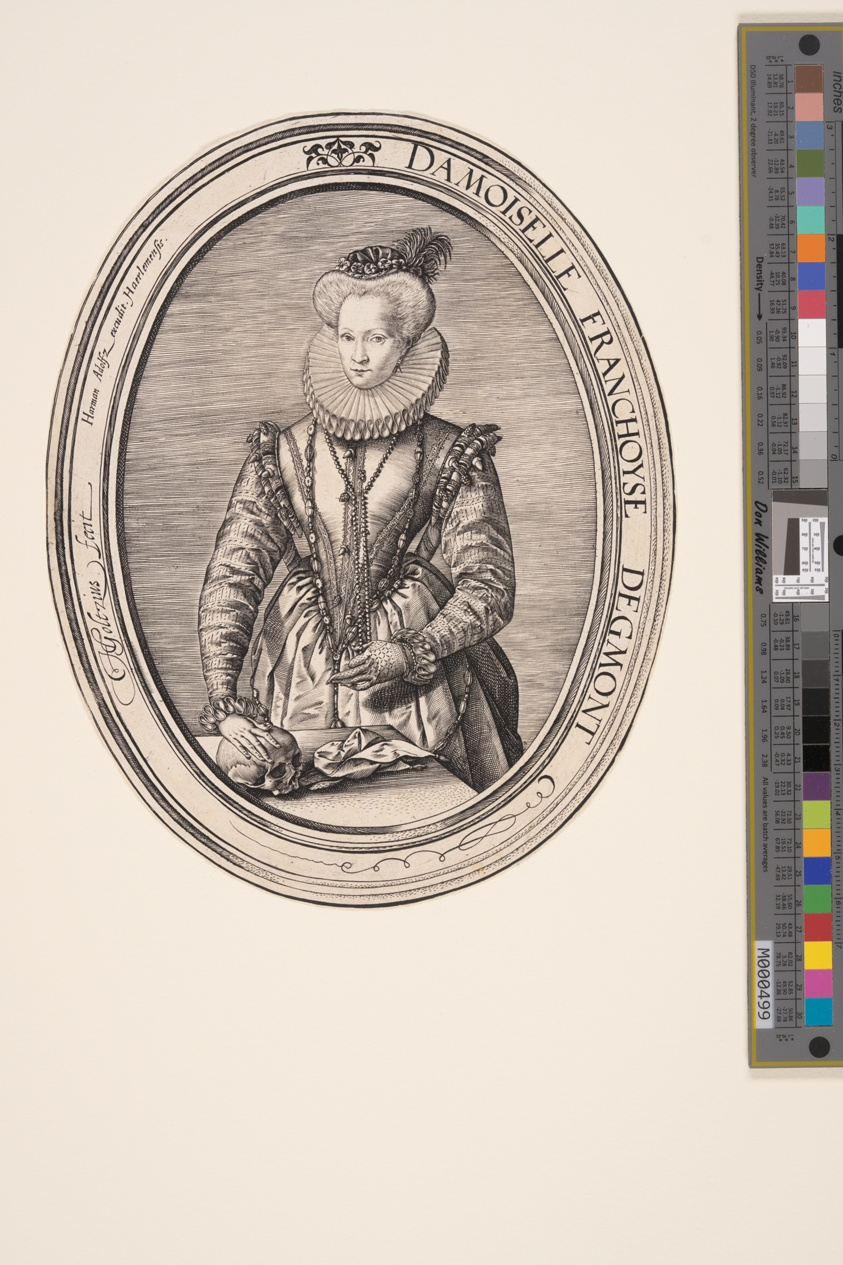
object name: Print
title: Françoise van Egmond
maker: Hendrick Goltzius (Dutch, 1558–1617)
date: 1580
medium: Engraving on laid paper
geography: Netherlands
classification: engraving; paper; print; prints and drawing